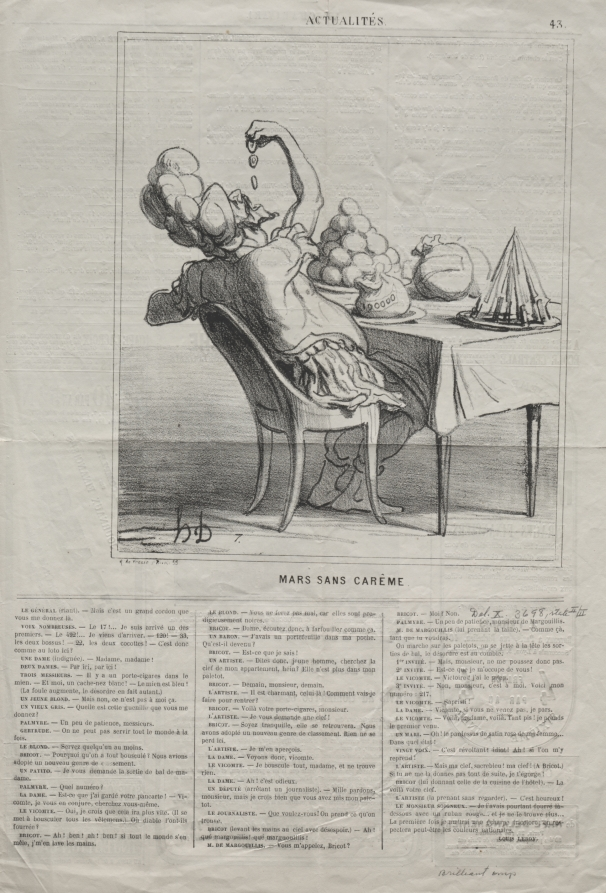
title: March without Lent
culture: France, 19th century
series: News of the Day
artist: Honoré Daumier (French, 1808–1879)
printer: Destouches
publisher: Arnaud de Vresse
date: 1869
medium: lithograph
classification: Print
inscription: Upper margin, pencil: 10 ; Lower page around newsprint, pencil: Del. X. 3698, state II/II / Brilliant imp ; Lower margin, printed: A. de Vresse r. Rivoli 55 / [faint] Lith Destouches, 28, r. Paradis, pre. Paris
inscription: Above image, printed: ACTUALITÉS. / 43 ; Below image, printed: MARS SANS CARÊME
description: This print was published in Le Charivari (March 12, 1869) as plate 43 from the series News of the Day.